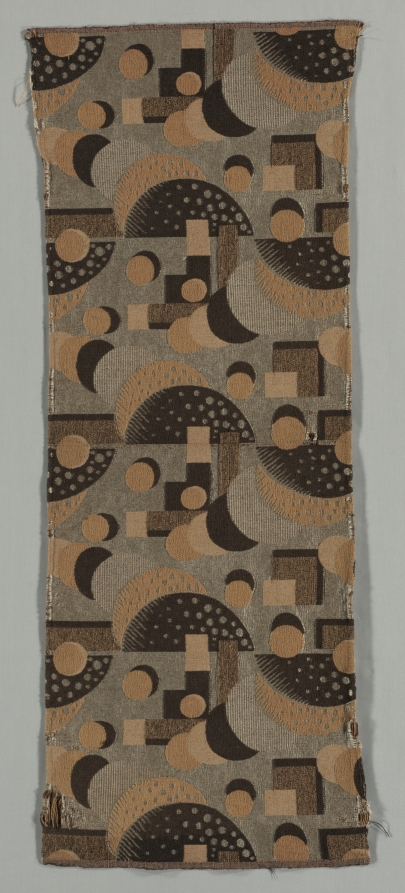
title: Textile Fragment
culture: France, 20th century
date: 20th century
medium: rayon and cotton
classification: Textile